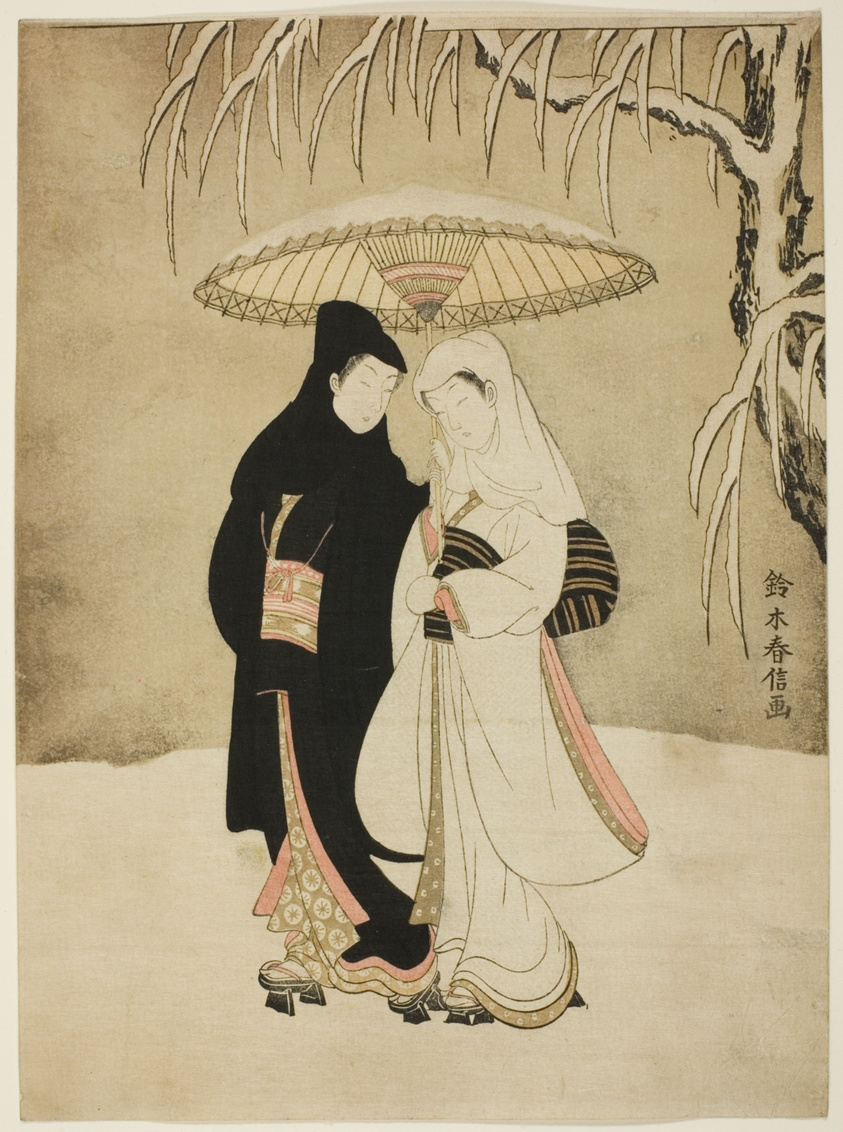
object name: Print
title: Lovers Beneath an Umbrella in the Snow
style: Japanese (culture or style)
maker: Suzuki Harunobu 鈴木 春信; Japanese, 1725 (?)-1770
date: c. 1767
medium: Color woodblock print; chuban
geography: Japan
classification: woodblock print; print; asian art